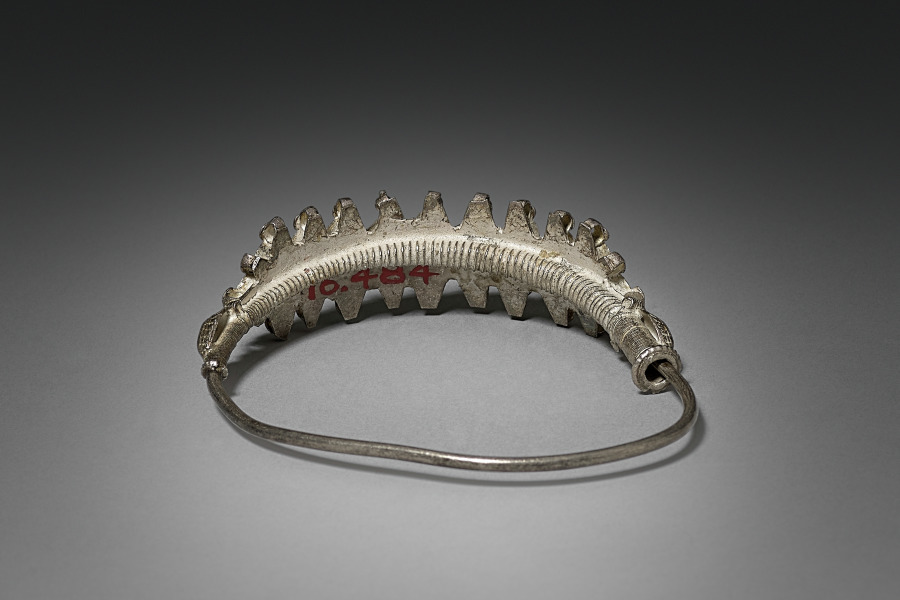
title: Nose Ring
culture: India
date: early 1900s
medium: silver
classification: Jewelry